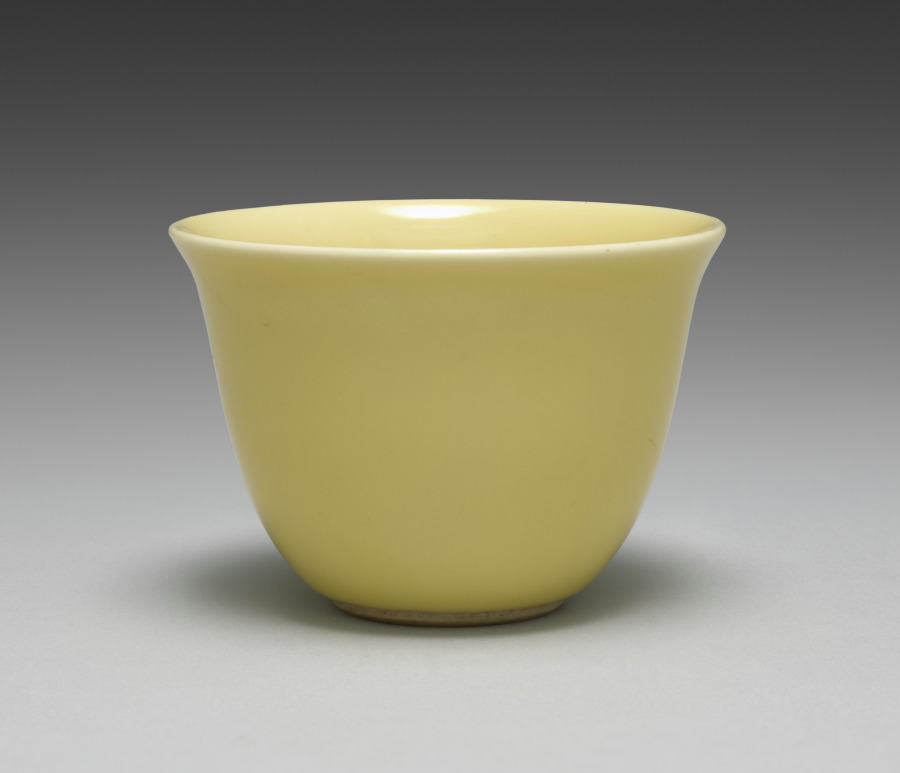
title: Cup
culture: Japan, Taishō period (1912–26) or Shōwa period (1926–89)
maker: Seifū Yohei IV (Japanese, 1872–1951)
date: 1914–46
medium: porcelain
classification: Ceramic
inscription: 清風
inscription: 清風造 【印】成山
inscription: 清風盧人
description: Like his father, Yohei IV also produced works with red or yellow monochrome glazes. His yellow-glazed works include this set of five drinking cups, a pair of sake pourers CMA 2022.216, and a sweets bowl molded into the shape of a chrysanthemum CMA 2022.218.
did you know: Seifū Yohei IV learned the ceramics industry from his father and painting from Tanomura Shosai.